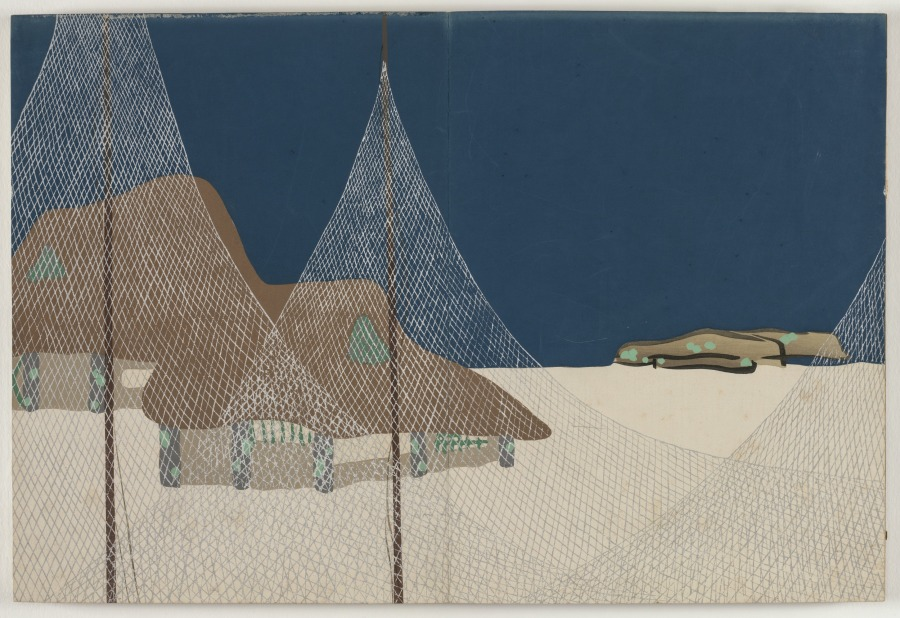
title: Flowers of a Hundred Worlds (Momoyogusa): Fishing Village (Ryoson)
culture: Japan, Meiji period (1868–1912)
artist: Kamisaka Sekka (Japanese, 1866–1942)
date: 1909–10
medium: color woodcuts with gold and silver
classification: Bound Volume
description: This print from a set of three woodblock printed albums displays the graphic design prowess of Kamisaka Sekka. The images were first distributed one by one to subscribers to the series but later were reissued in bound form, like this book, for mass consumers. Each print features a vignette taken from nature or Japanese literature. Many of the scenes have a long history in Japan, originating in the 900s or 1000s and having been interpreted by all manner of artists since that time. Sekka’s selections hew closely to precedents from the Rinpa style originated by painter Tawaraya Sōtatsu (c. 1570–c. 1640) and calligrapher Hon’ami Kōetsu (1558–1637).